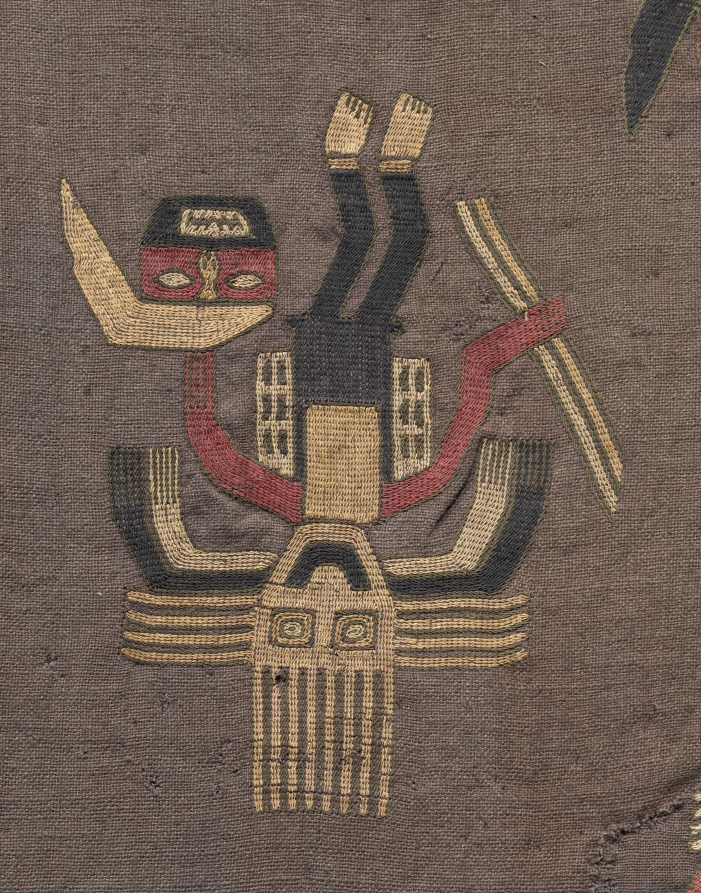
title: Fragment of Embroidered Cloth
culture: Peru, South Coast, Paracas, Late Period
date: c. 300–100 BCE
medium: embroidery on plain wool ground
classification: Textile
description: The repetition of a nonmythical figure, in this case a warrior holding spears and a trophy head, was one of the important innovations of Paracas textile design during the Late Paracas period. The trophy head cult was an essential aspect of crop fertility and was, therefore, a focal point of Paracas art in general.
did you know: Extremely dry conditions on Peru's desert coast allow for the extraordinary preservation of textiles.